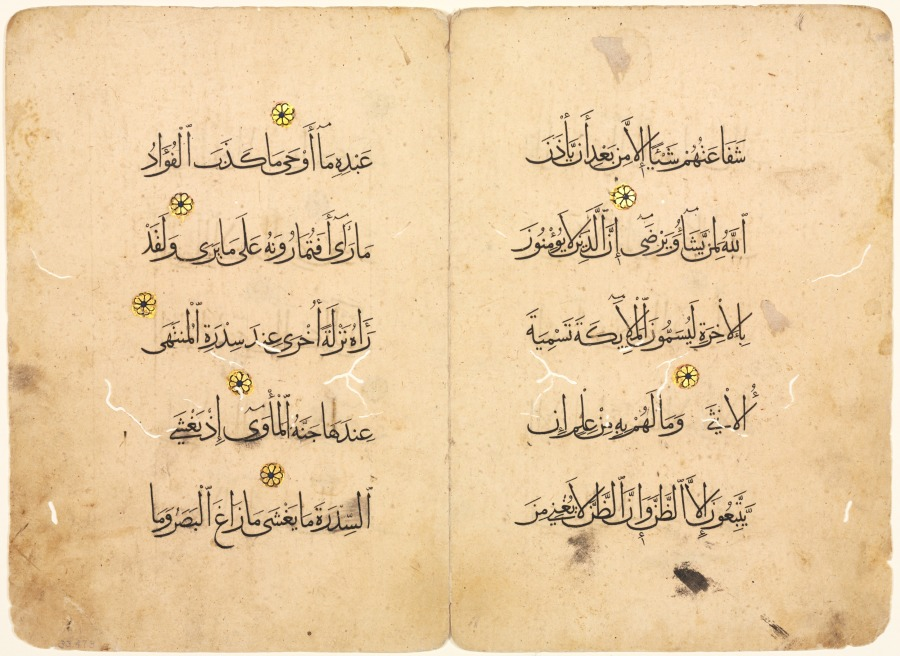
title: Qur'an Manuscript Folio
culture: Egypt, Mamluk sultanate (1250–1517)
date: 1300s–1400s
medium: ink, gold, and colors on paper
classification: Drawing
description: It is through the Arabic language that the Qur’an was revealed to the Prophet Muhammad in the 600s. As a result, calligraphy is celebrated as the highest form in Islamic art. The verses (ayat) written here come from the 53rd chapter (surah) of the Qur’an, also known as the Surah An-Najm, the Chapter of the Star. The significance of the Qur’an provides an explanation for the importance of calligraphy, but its use was not restricted to religious texts. Many objects in the museum's Islamic collection bear calligraphic inscriptions and come from secular contexts, displaying the versatility and creativity of this art form.